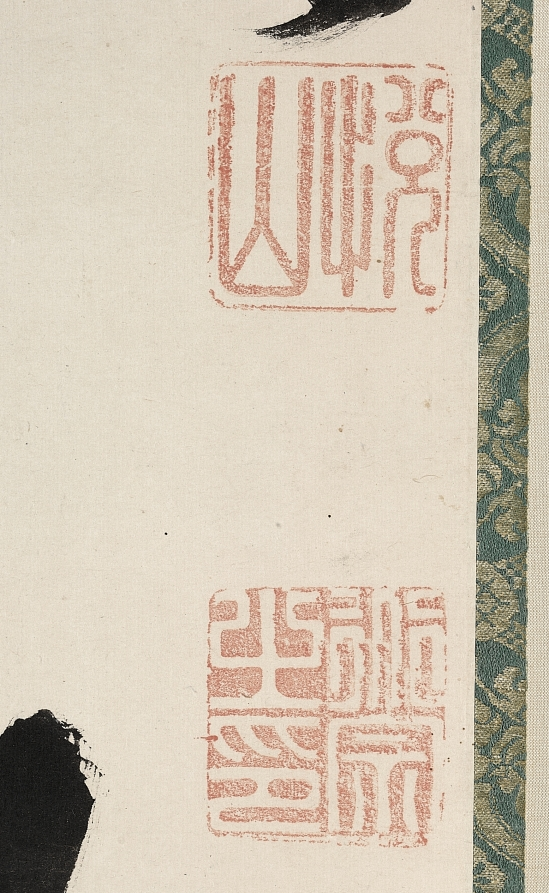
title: Calligraphy in Semi-Cursive Style (xing-caoshu)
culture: China, Qing dynasty (1644-1911)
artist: Yueshan Daozong (Chinese, 1629–1709)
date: c. 1660–1709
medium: hanging scroll; ink on paper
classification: Calligraphy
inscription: 吟風一樣松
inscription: 悅山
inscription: 道宗之印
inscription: Linji zheng zong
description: This bold calligraphy written by Yueshan, an Ōbaku school monk, consists of five characters tentatively translated as “Pine trees singing in the wind.” The line is from Cold Mountain Poems (Hanshan shi). Cold Mountain is the pen name (hao) of the poet monk Han Shan, as well as the name of a place. In one poem Han describes getting lost on the road to Cold Mountain, perhaps an allusion to the search for religious enlightenment.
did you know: The Ōbaku school of Chan (Zen in Japanese) Buddhism was founded in Japan by Chinese monks in the 1600s. The monk Yueshan emigrated from the Chinese province of Fujian to serve as priest and later abbot at Manpukuji, the headquarters of the Ōbaku school in Japan.